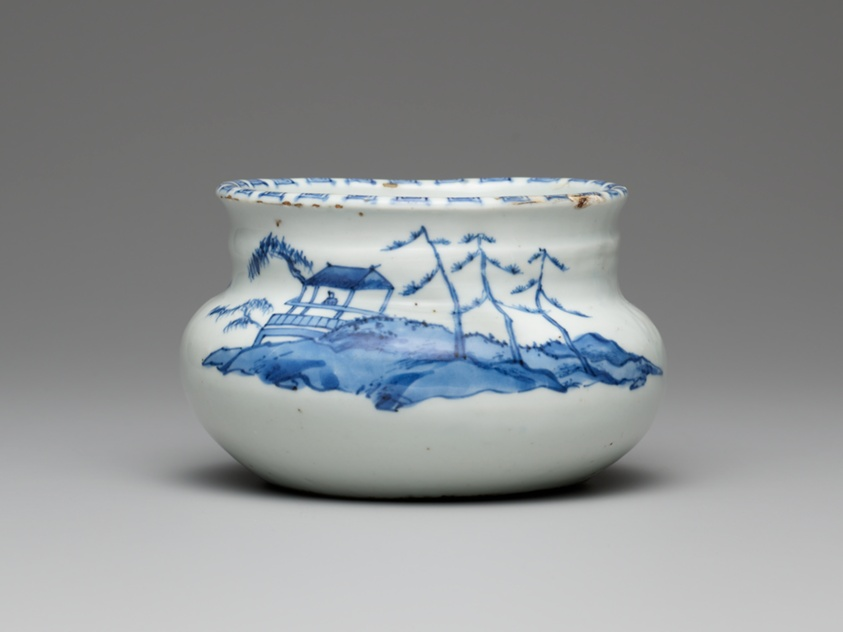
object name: Ceramics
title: Water Jar (mizusashi) with Decoration of a Landscape Scene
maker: China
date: About 1621-27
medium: Glazed porcelain with cobalt underglaze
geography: China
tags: landscapes